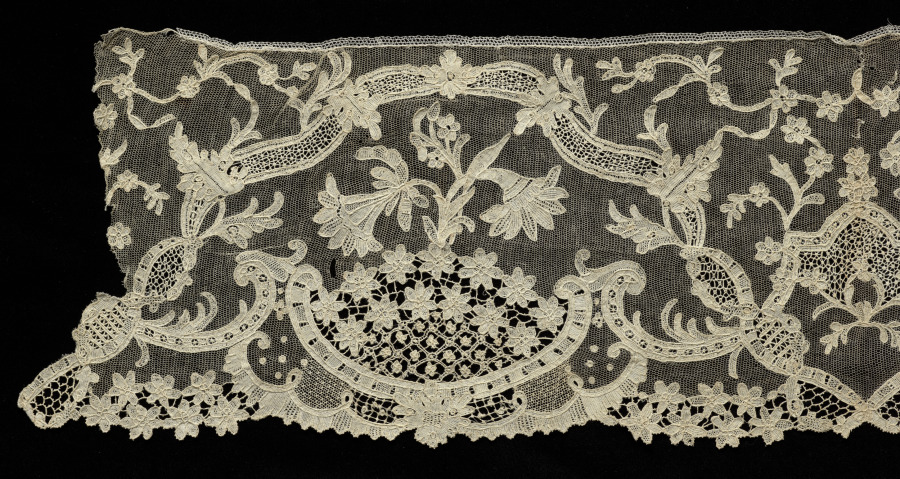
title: Lace Flounce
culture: Italy, Burano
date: 1900–1943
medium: Linen: needle lace (Burano Point)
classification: Lace